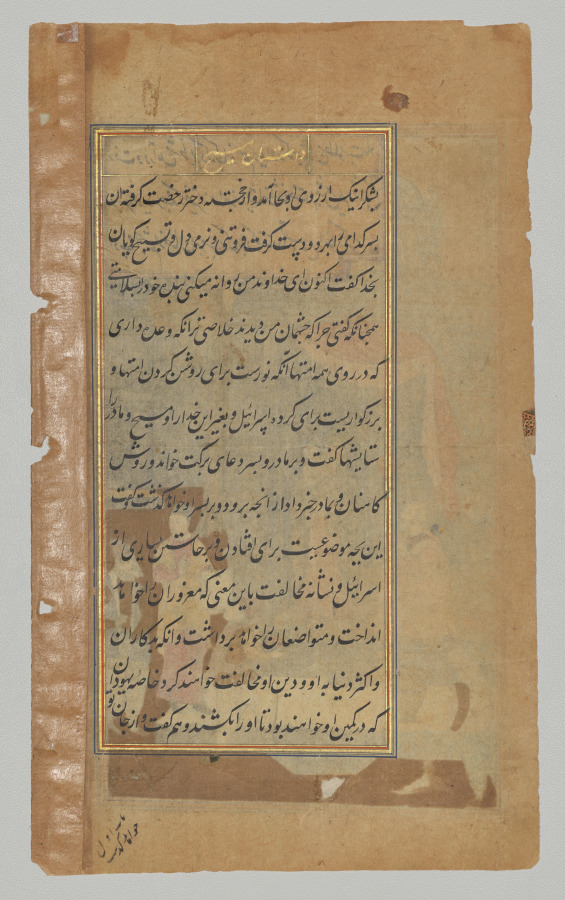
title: Text page from a Mirror of Holiness (Mir’at al-quds) of Father Jerome Xavier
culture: Mughal India, Allahabad, made for Prince Salim (1569–1627)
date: 1602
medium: Ink and gold on paper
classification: Manuscript